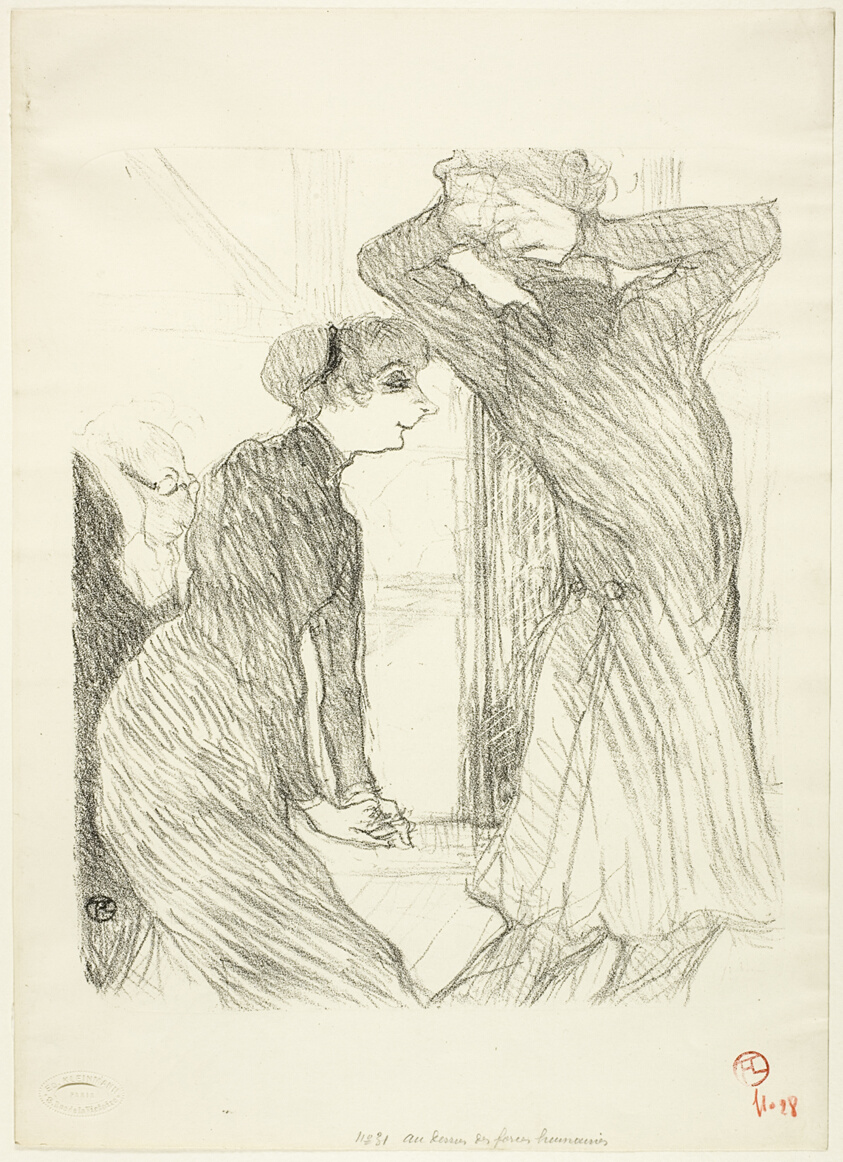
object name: Print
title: Lugné-Poé and Bady, in "Au-Dessus des Forces Humaines"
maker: Henri de Toulouse-Lautrec (French, 1864-1901)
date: 1894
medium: Lithograph on cream wove paper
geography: France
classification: lithograph; print; prints and drawing